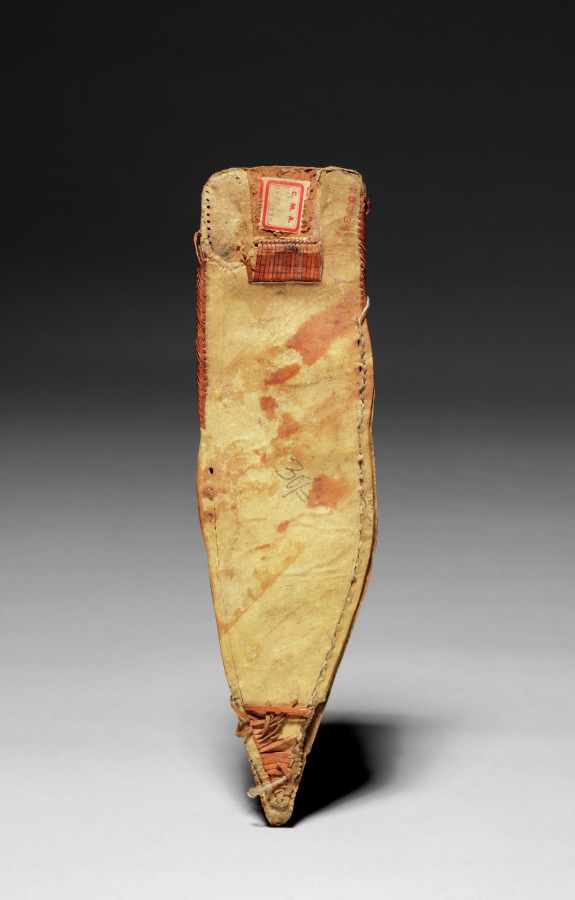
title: Scabbard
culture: Africa, East Africa, Somalia, unknown maker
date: early 1900s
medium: Rawhide or leather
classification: Arms and Armor